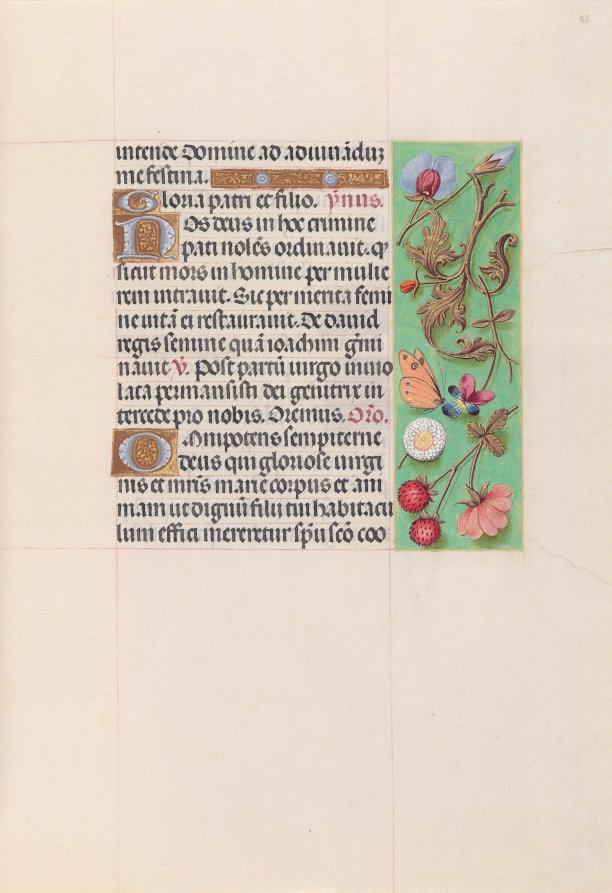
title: Hours of Queen Isabella the Catholic, Queen of Spain: Fol. 82r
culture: Flanders, Ghent and Bruges, late 15th century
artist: Master of the First Prayerbook of Maximillian (Flemish, c. 1444–1519)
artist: and Associates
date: c. 1500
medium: ink, tempera, and gold on vellum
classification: Bound Volume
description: This manuscript was illuminated by a circle of at least five highly organized manuscript painters active in the Flemish cities of Ghent and Bruges. The principal illuminator was Alexander Bening, who painted the majority of the book's miniatures. Manuscripts produced by this circle of artists are renowned for the decoration of their borders, which typically feature a rich variety of realistically-painted flowers, birds, and butterflies. This prayer book, called a book of hours, was intended not for a cleric, but for the private devotions of a lay person-in this case, Isabella the Catholic, Queen of Spain (1451-1504). Isabella's coat of arms embellishes the book's frontispiece. It is unlikely that the book was commissioned by the Queen herself; rather, she probably received it as a diplomatic gift from someone courting her patronage, perhaps Cardinal Francisco Jimenez de Cisneros. A Franciscan friar, Jimenez was dependent upon Isabella for his advancement, first to the post of Queen's confessor in 1492, and then to Archbishop of Toledo in 1495.